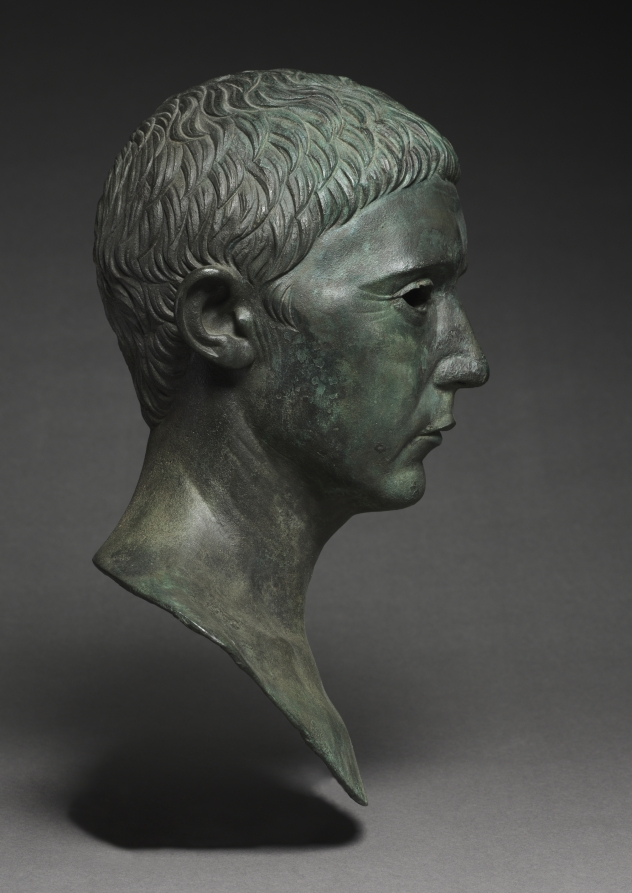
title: Portrait Bust of a Man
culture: Italy, Roman, Augustan period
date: 27 BCE–14 CE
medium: bronze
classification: Sculpture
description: The realistic features of this fine life-sized portrait include wrinkles in the forehead and beside each eye, and very naturalistic ears, protruding but not quite symmetrical. The stylized hair is neatly arranged and suggests a date in the Augustan period, although some scholars have seen it as late Republican. Likely once topping a shaft as a herm bust, the portrait’s subject—now unknown—would have been identified by an inscription.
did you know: This portrait originally had inlaid eyes, probably in stone, glass, or ivory.